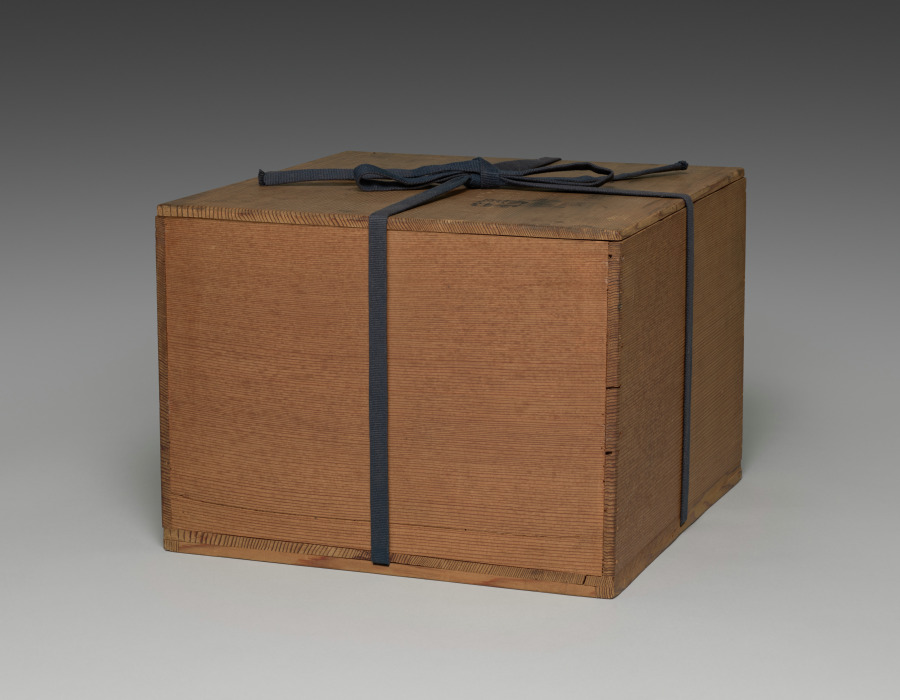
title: Covered Bowl with Seven Treasures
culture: Japan, Edo period (1615–1868)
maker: Seifū Yohei II (Japanese, 1844–1878)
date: 1861–78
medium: Stoneware with overglaze color enamel and gold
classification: Ceramic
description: The box lid for this large covered bowl by Yohei II identifies it as in the style of Ninsei, a reference to Nonomura Ninsei. Overglaze enamels in red, green, and white sit within lattices of jewel-shaped gold forms scattered across the lid and base in a design known as the seven treasures. At the center of the lid is a knob in the shape of a peach with a stem and leaves. A prominent feature of the piece is the appearance of warm pink dots known as gohon. Here creamy at their center and with a gradation to almost red at the edges, they appear during firing due to high iron content in the clay. Pieces with this effect were made in emulation of certain ash-glazed ceramics imported from Korea. The originals were made to order for the Japanese market at a kiln in Busan. The kiln was established within the Japanese diplomatic compound in that port city by the lord of Tsushima in 1639 and continued production until 1717. In the 17th century, teabowls from Korea in a variety of styles were extremely popular among practitioners of Japanese-style tea, and they were soon copied by ceramists active on the archipelago, including in Kyoto.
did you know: The peach's leaf veins are detailed in gold.